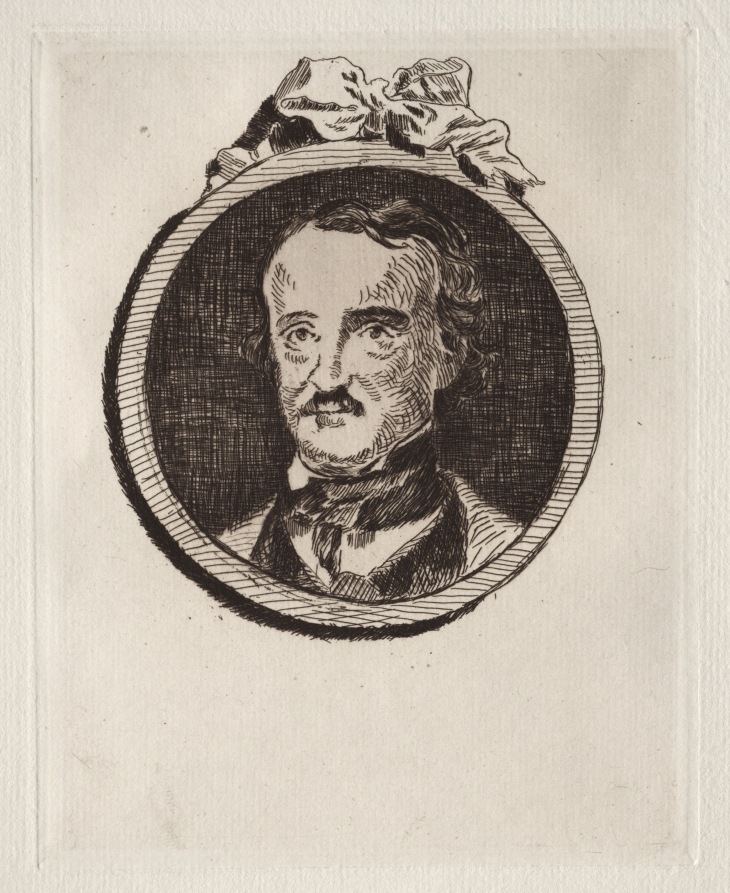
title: Edgar Allan Poe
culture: France, 19th century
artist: Édouard Manet (French, 1832–1883)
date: 1860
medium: etching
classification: Print